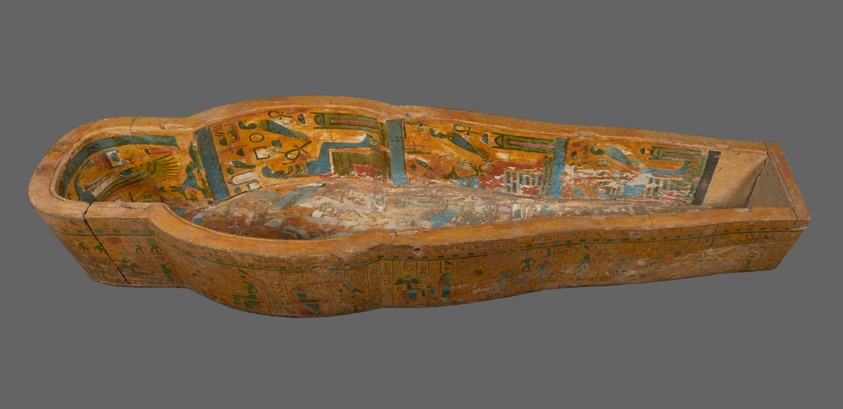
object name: Funerary Object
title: Coffin of Nespahertahat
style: twenty-first dynasty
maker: Egyptian; possibly Deir el-Bahri, Thebes (now Luxor), Egypt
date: Third Intermediate Period, Dynasty 21 (about 1069 –945 BCE)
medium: Wood and pigment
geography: Ancient Egypt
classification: coffin; ancient art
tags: funerary art